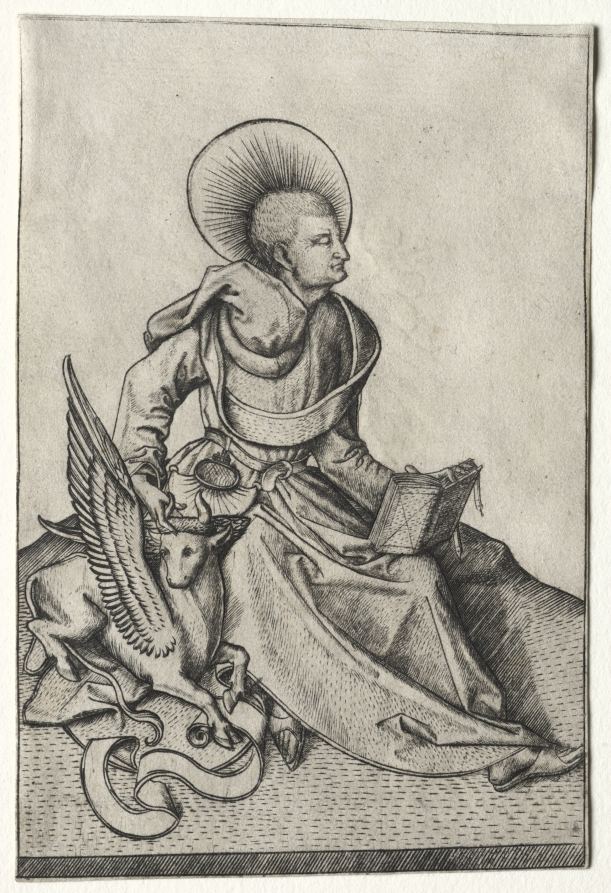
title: The Evangelists: St. Luke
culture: Germany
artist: Master ES (German, active 1450–67)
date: 1450–67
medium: engraving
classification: Print